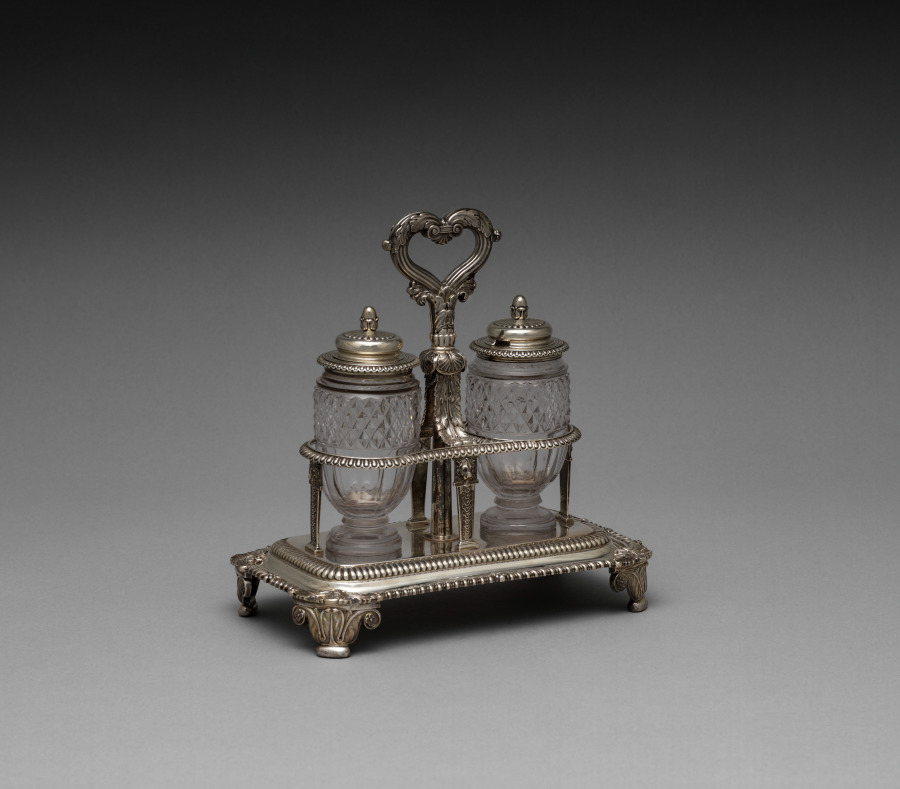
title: Cruet Set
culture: England, London, 19th century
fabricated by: Paul Storr (British, 1771–1844)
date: 1817–1818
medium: silver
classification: Silver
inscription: Stamped on lid: "PS", Lion Passant, "b".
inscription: Scratched on base of pot: "3136".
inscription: Stamped underside of base: "PS", Lion Passant, Crowned Leopard, "b", George III duty mark.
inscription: Scratched underside: "56\ Eoxx \moxx", "6087", "SRH-".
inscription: "2" engraved on base leg of stand and by pin on underside.